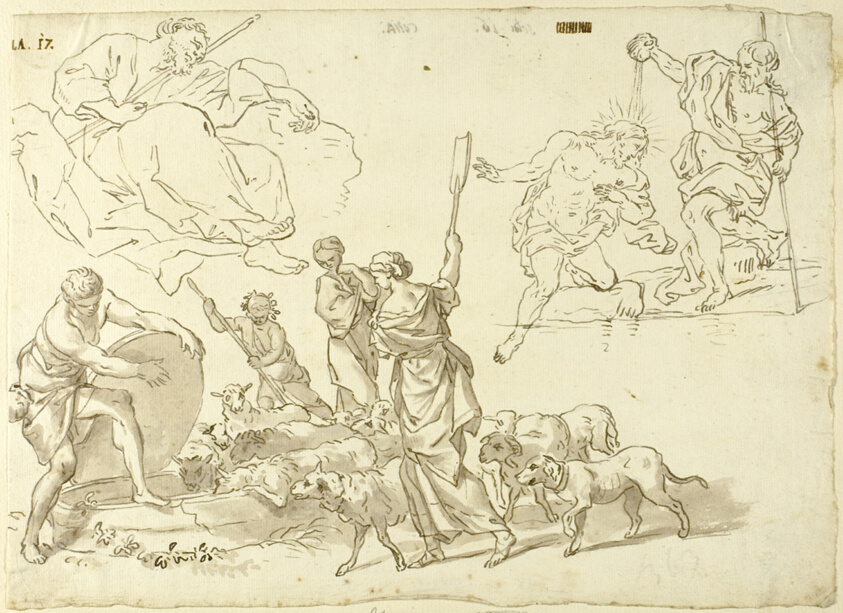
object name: Drawing and Watercolor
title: Sketches of Religious Scenes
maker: Possibly after Domenico Piola (Italian, 1627-1703); or Style of Francesco Solimena (Italian, 1657-1747); or Studio of Domenico Piola (Italian, 1627-1703)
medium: Pen and brown ink, with brush and brown wash on ivory laid paper, tipped onto cream laid paper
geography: Italy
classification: drawings (visual works); prints and drawing